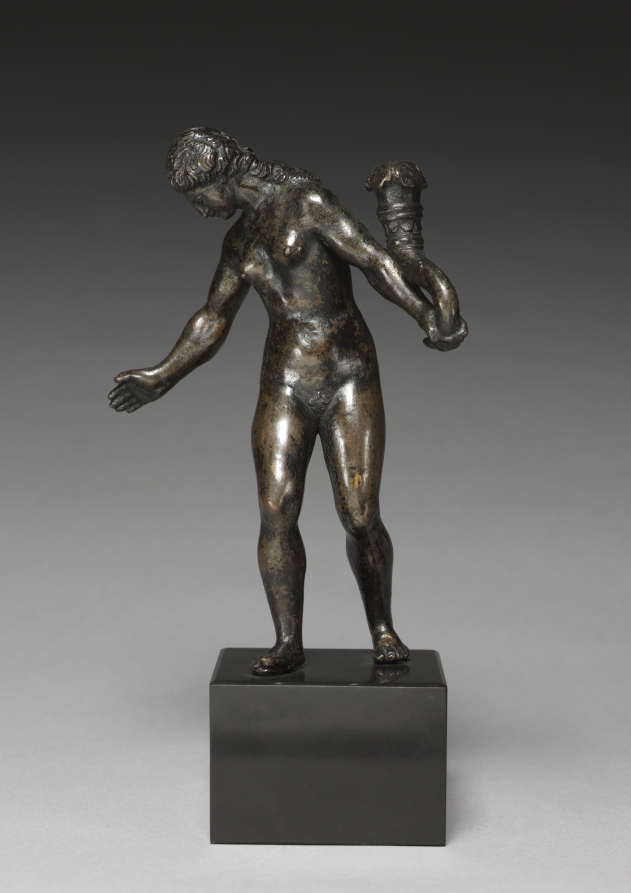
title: Woman with a Cornucopia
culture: Italy, 16th century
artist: Severo da Ravenna (Italian, c.1496–c.1543)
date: c. 1525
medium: bronze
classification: Sculpture